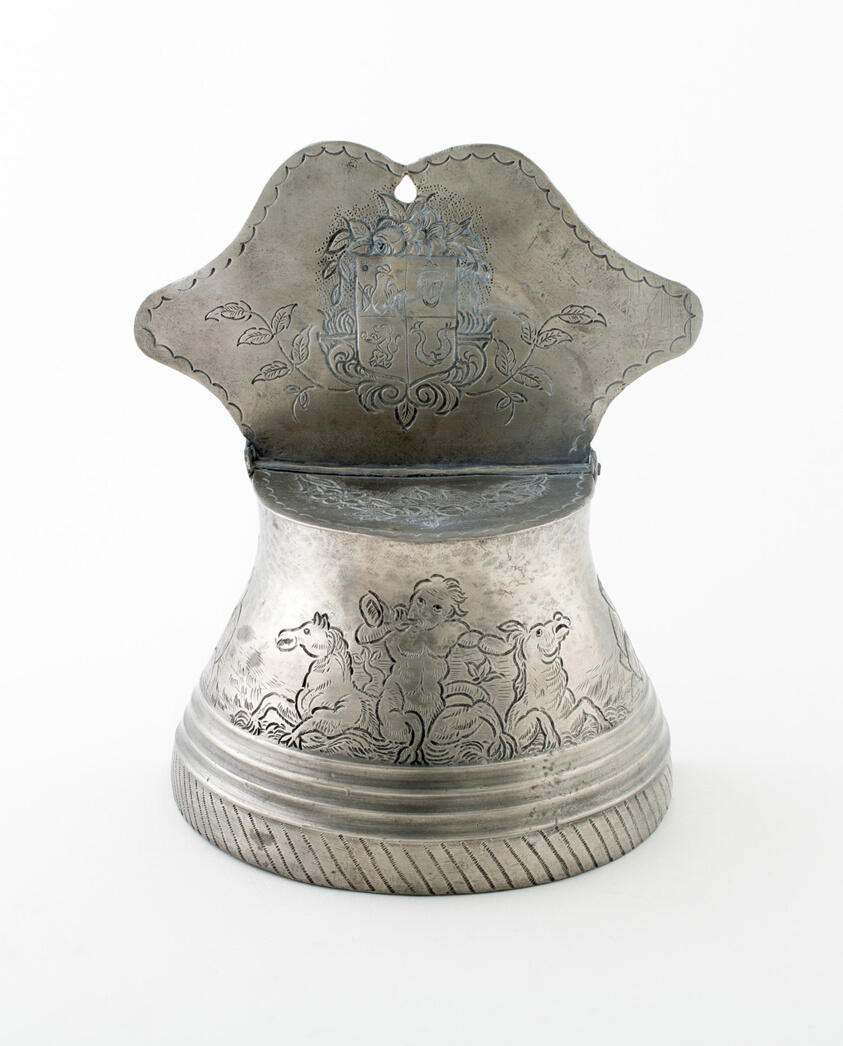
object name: Metalwork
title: Salt Box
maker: Germany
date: c. 1800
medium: Pewter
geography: Germany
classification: pewter; metalwork; european decorative arts